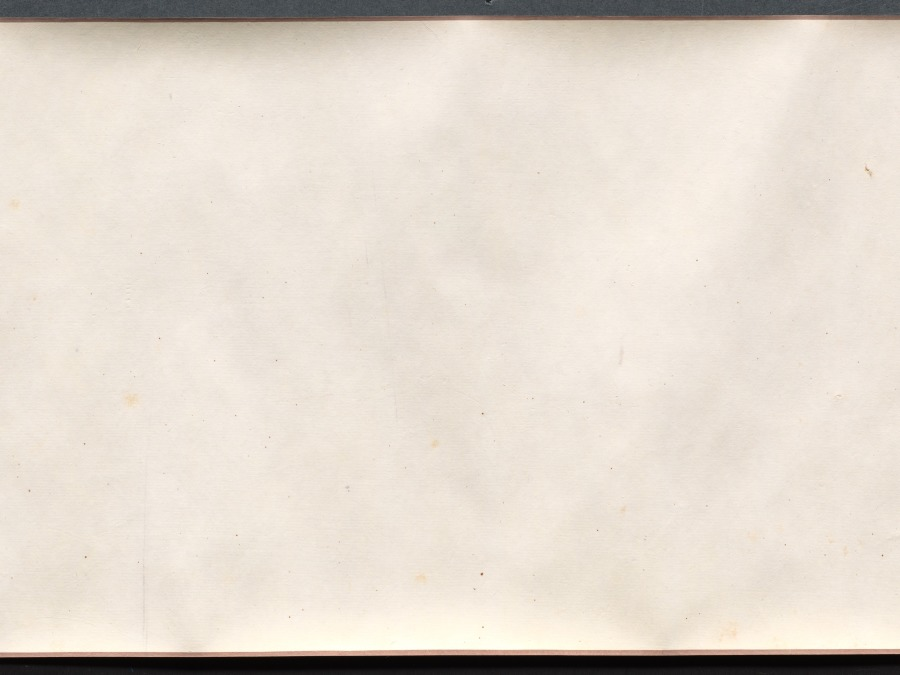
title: Four Poems: Calligraphy in Cursive Script (xingshu)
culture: China, Ming dynasty (1368–1644)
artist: Chen Jiru (Chinese, 1558–1639)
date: 1500s-1600s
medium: handscroll; ink on gold speckled paper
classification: Calligraphy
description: Written in graceful calligraphy with well-composed characters, the artist communicates his thoughts and state of mind in four poems. Characters written in dark, thick strokes convey rhythm, and indicate the moment after the writer had paused to recharge his brush with ink. Chen Jiru was a native of Huating (modern Shanghai). His calligraphy style resembles that of his friend, influential calligrapher Dong Qichang (1555–1636). Unlike Dong, Chen did not pursue government service: he burned his Confucian robes, declined a summons to serve at court, and immersed himself in literature, calligraphy, and painting.